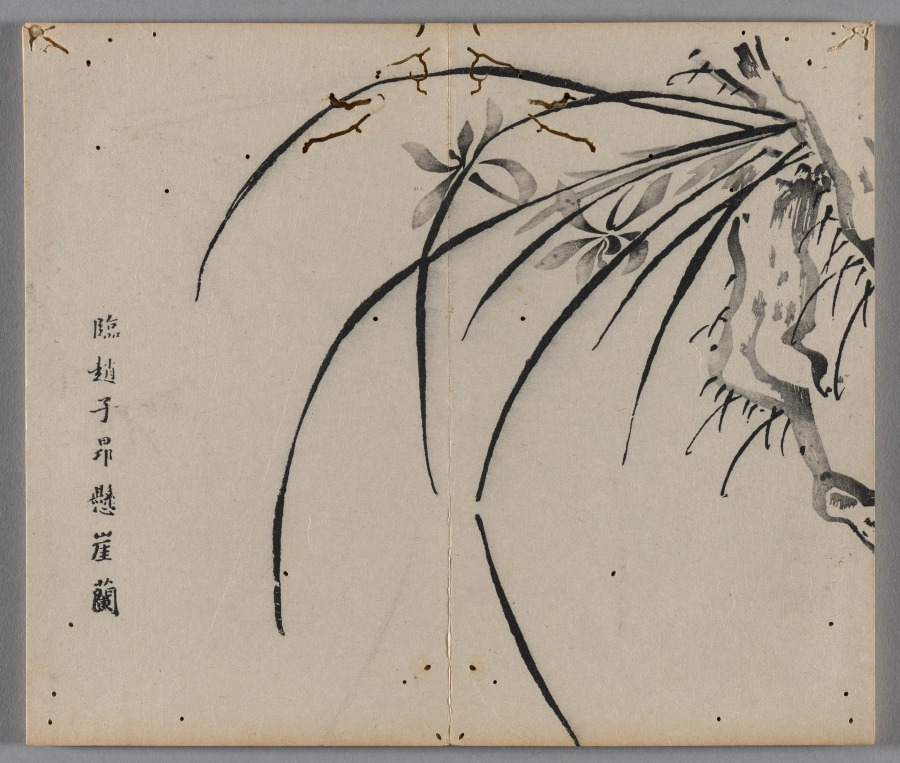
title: Ten Bamboo Studio Painting and Calligraphy Handbook (Shizhuzhai shuhua pu): Orchids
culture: China, Qing dynasty (1644-1911)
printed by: Hu Zhengyan (Chinese, c. 1584–1674)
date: 1633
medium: Woodblock-printed book; ink and colors on paper; first edition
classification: Print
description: Color printing reached a level of perfection in the early 1600s, as seen in this Ten Bamboo Studio Collection of Calligraphy and Painting and the Mustard Seed Garden Manual of Painting (printed 1679 and 1701). The painterly quality, precision in registering (aligning) the woodblocks, and harmonious colors made them the most successful color print editions in Chinese history. Both editions were printed and compiled in Nanjing, spread nationwide, and had a great impact on the arts in Japan and Korea.